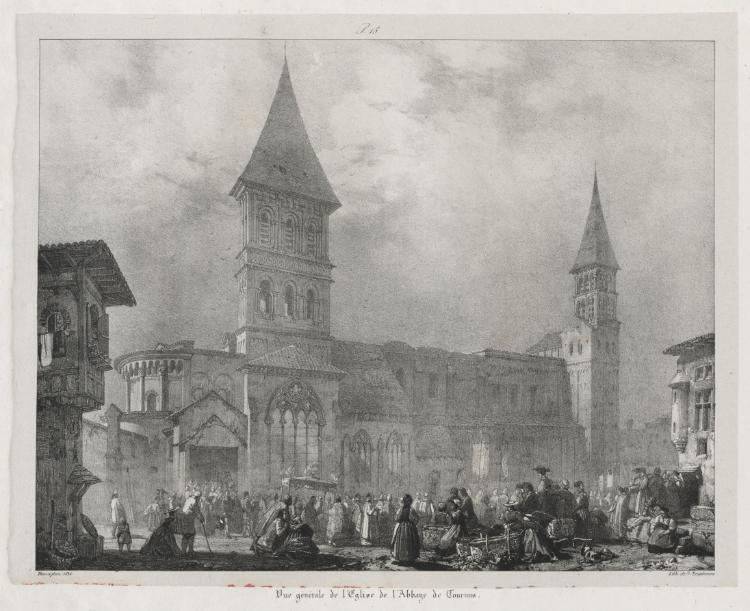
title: Voyages pittoresques et romantiques dans l'ancienne France, Franche-Comté: Église de l'abbaye de Tournus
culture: England, 19th century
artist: Richard Parkes Bonington (British, 1802–1828)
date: 1825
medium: lithograph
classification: Print